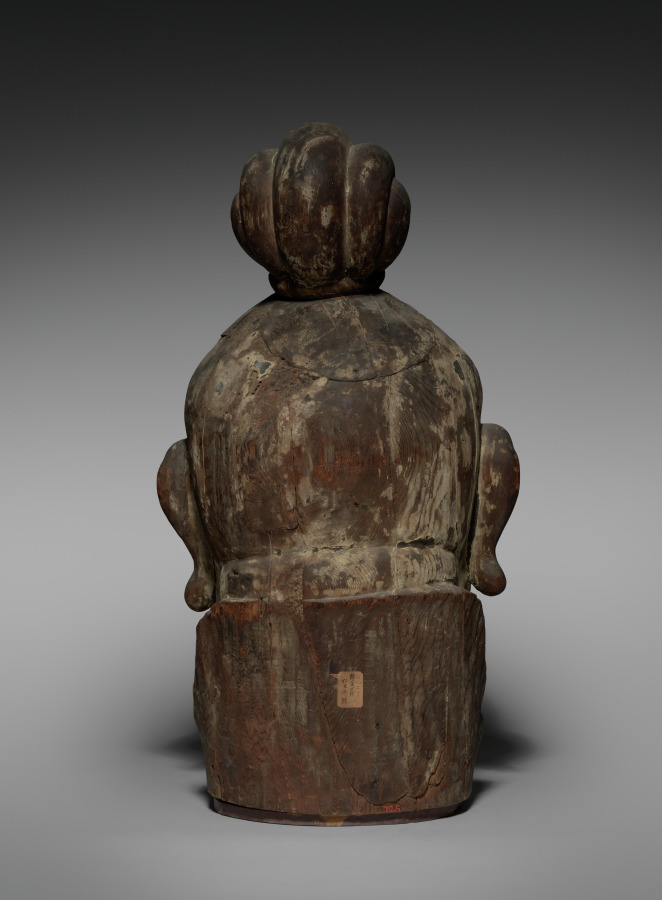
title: Head of Ni-o with Closed Mouth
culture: Japan, Kamakura period (1185–1333)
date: 1200s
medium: wood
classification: Sculpture